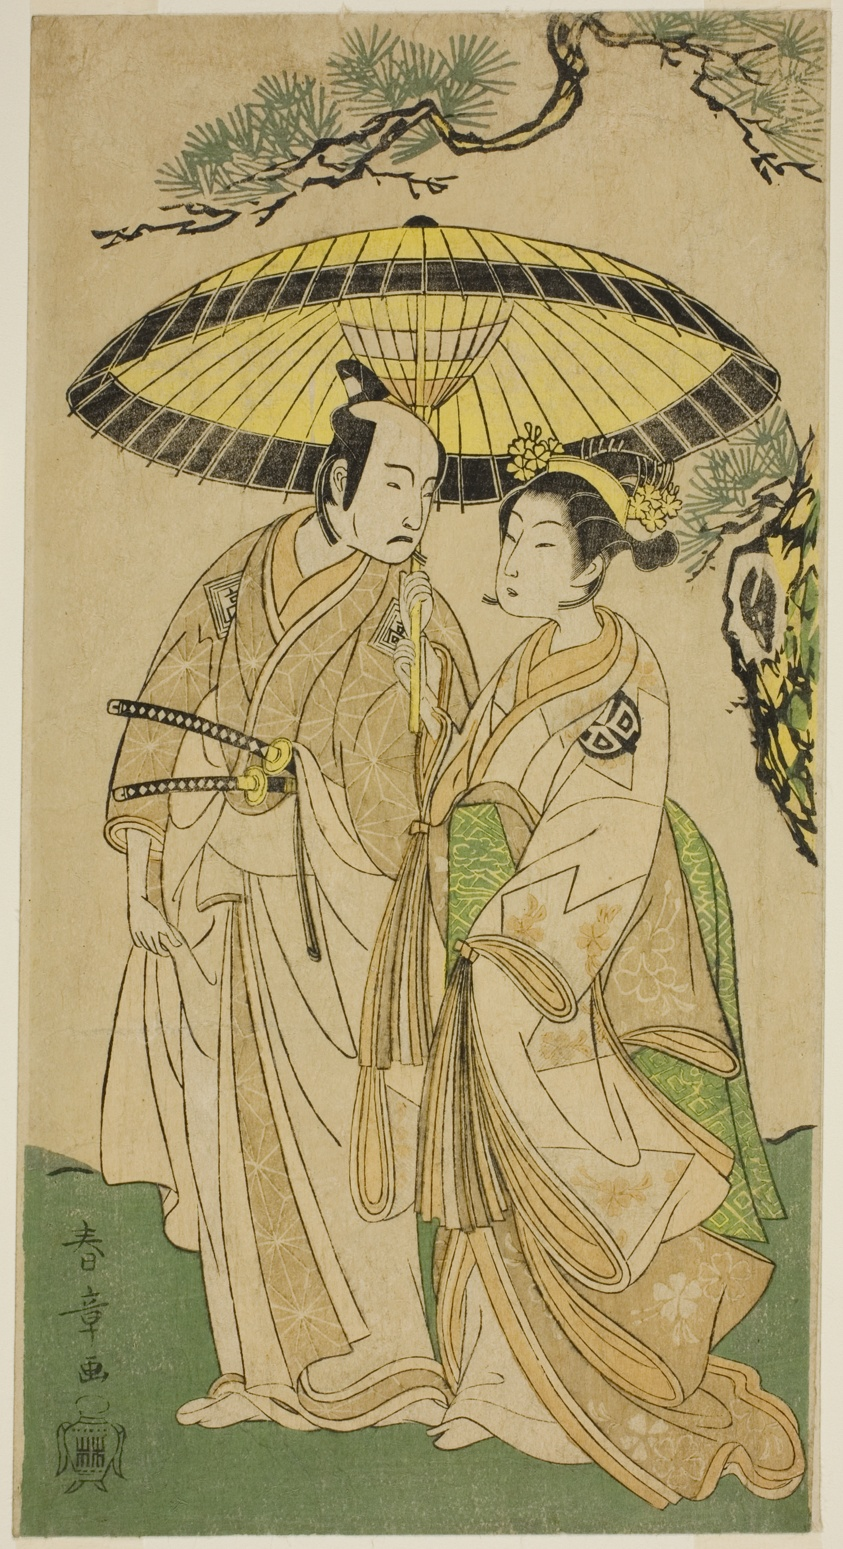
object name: Print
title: The Actors Arashi Hinaji I (right), and Ichikawa Komazo II (left), as Princess Sakura (Sakura Hime) (?) and Shimizu Tonoinosuke (?), in the Play Soga Moyo Aigo no Wakamatsu (?), Performed at the Nakamura Theater (?) in the Third Month, 1769 (?)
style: Japanese (culture or style)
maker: Katsukawa Shunsho 勝川 春章; Japanese, 1726-1792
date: c. 1769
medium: Color woodblock print; hosoban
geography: Japan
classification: woodblock print; print; asian art